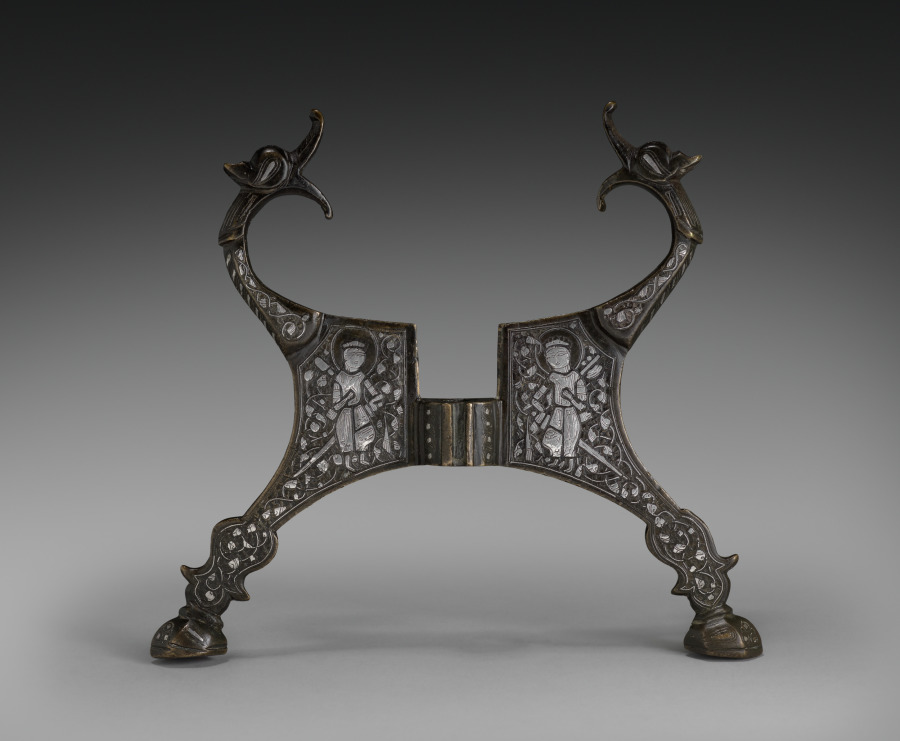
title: Dragon-headed Stand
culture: Northern Iraq or Syria, Zangid (1127–1251) or Ayyubid period (1171–1260)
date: 1200s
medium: Cast brass inlaid with silver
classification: Metalwork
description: Themes of hunting and combat are evoked by this stand with gaping dragon heads and figures armed with swords and spears.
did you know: Each hunter's head is surrounded by a nimbus.